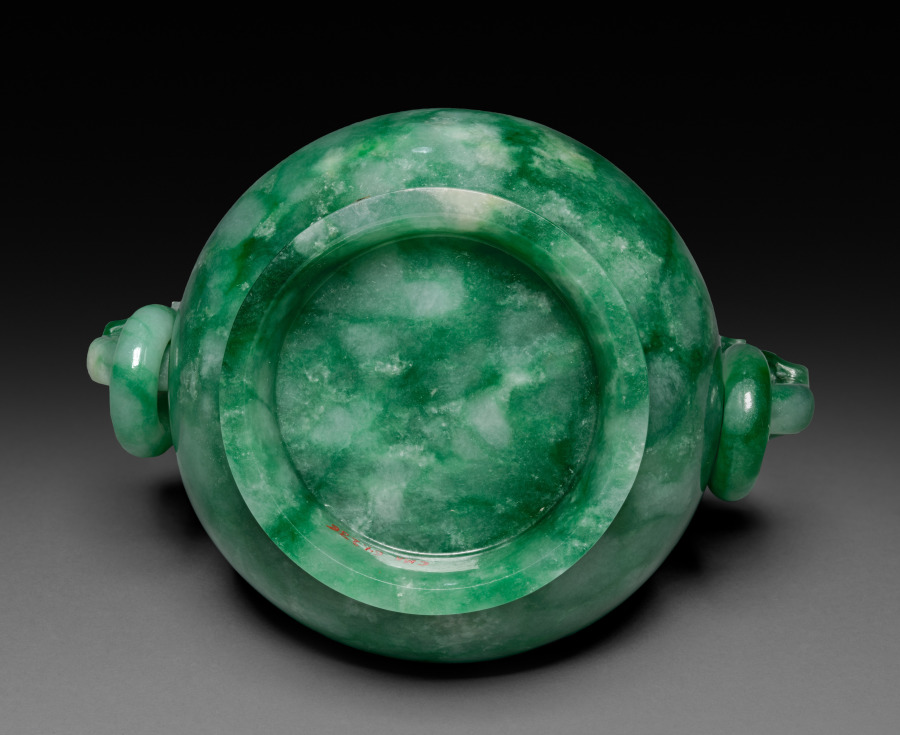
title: Incense Burner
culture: China, Qing dynasty (1644–1911), Qianlong reign (1736–95)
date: 1736–95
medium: green jade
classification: Jade